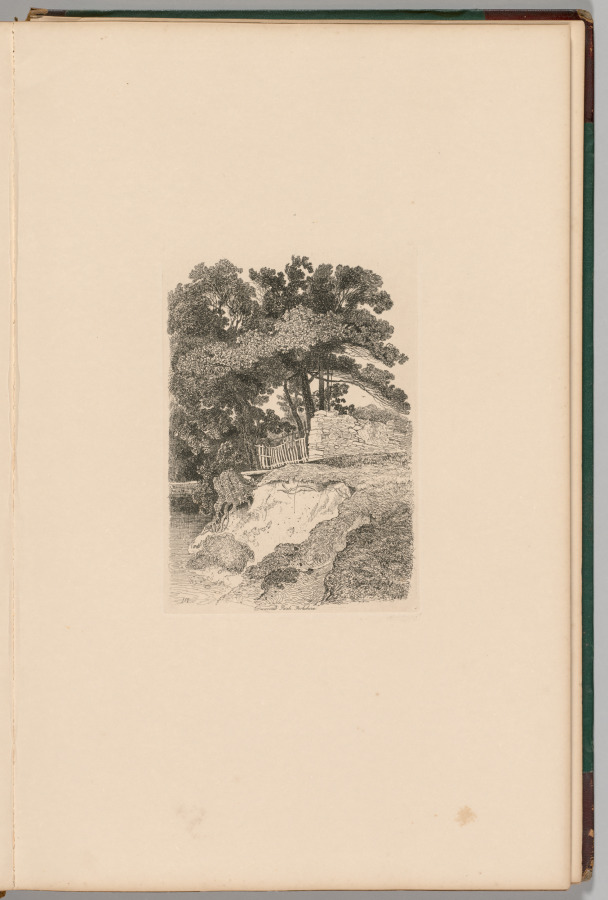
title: Liber Studiorum: Plate 13, Duncomb Park, Yorkshire: No. 5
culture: England, 19th century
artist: John Sell Cotman (British, 1782–1842)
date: 1838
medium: softground etching, from a bound volume containing 48 plates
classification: Bound Volume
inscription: In plate, within image, upper right: 13; in plate, lower left: JSC: in plate, below image: Duncomb Park, Yorkshire